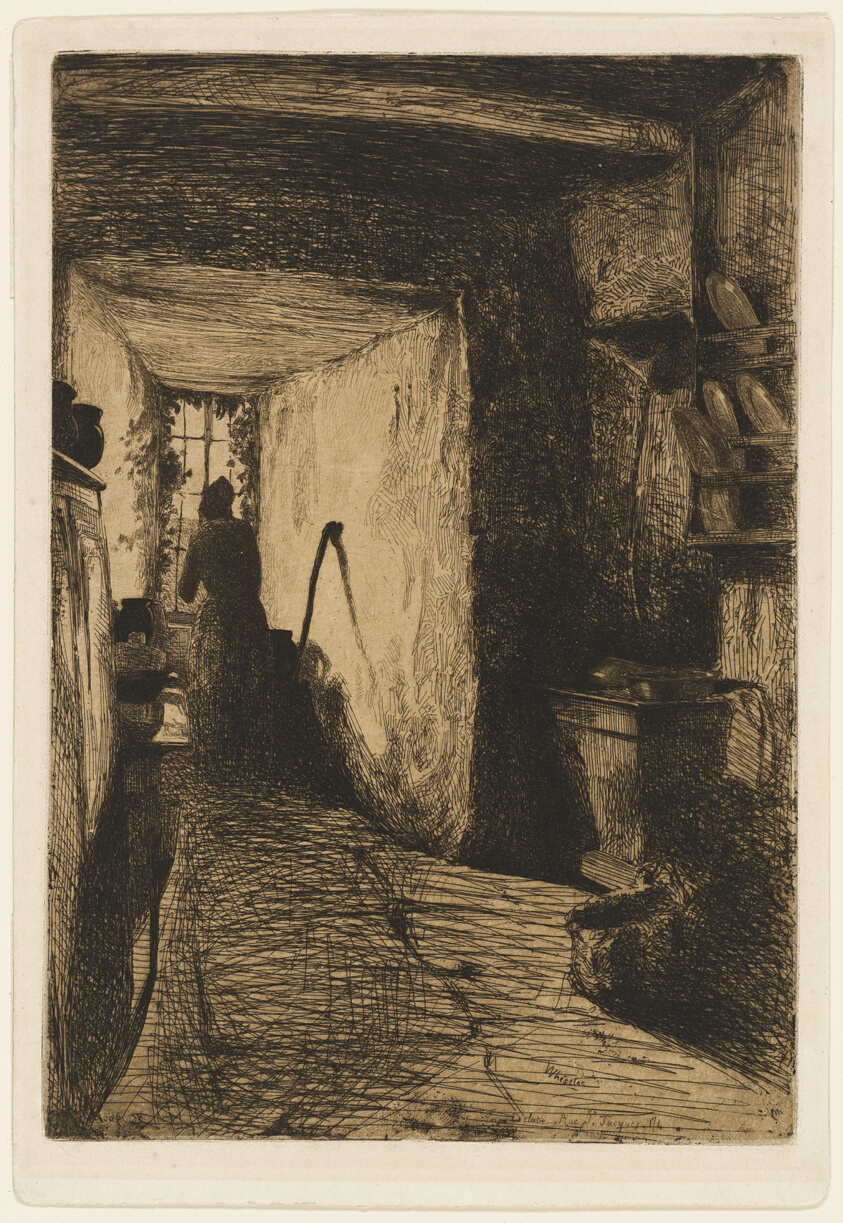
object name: Print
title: The Kitchen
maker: James McNeill Whistler (American, 1834-1903)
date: 1858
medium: Etching with foul biting in black ink on buff China paper laid down on off-white wove paper (chine collé)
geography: United States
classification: etching; foul biting; print; prints and drawing; paper